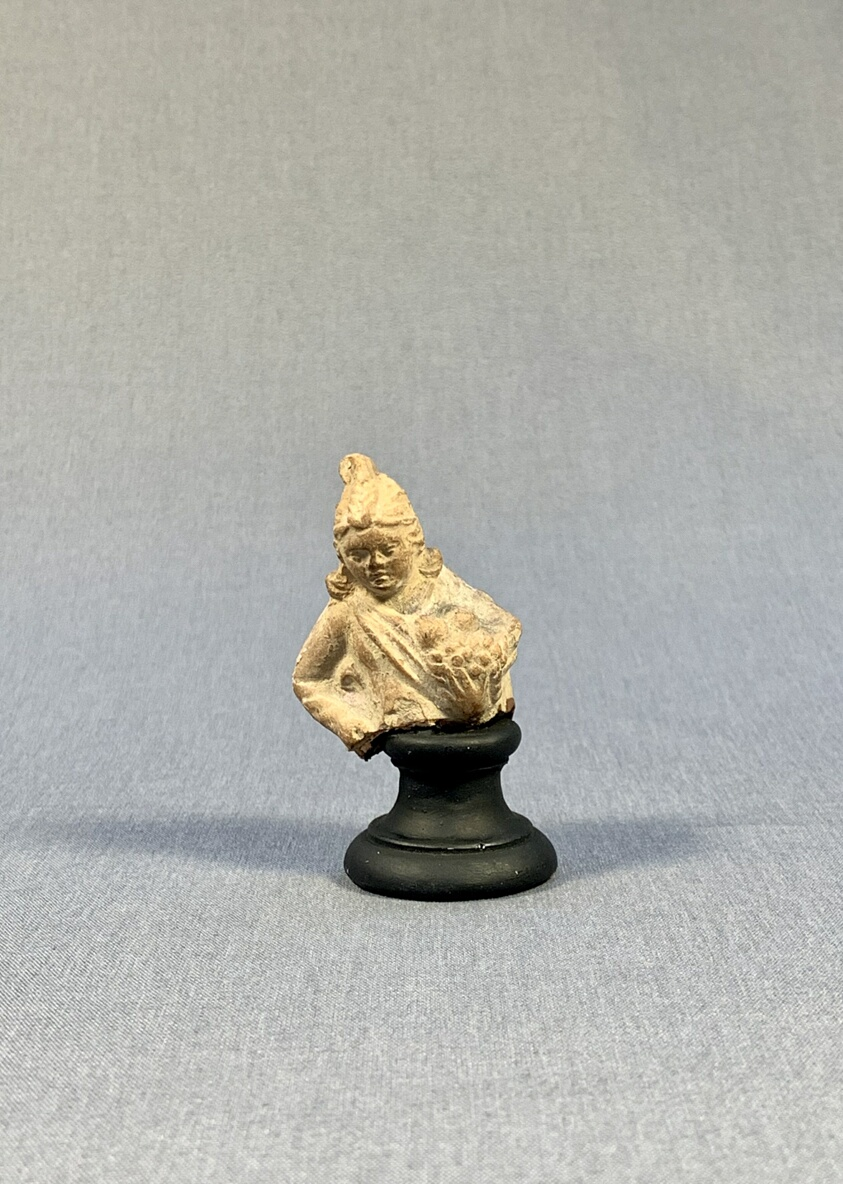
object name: Sculpture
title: Torso of a Child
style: greek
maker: Greek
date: 2nd-1st century BCE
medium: terracotta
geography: Greece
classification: earthenware; ceramics; sculpture; ancient art